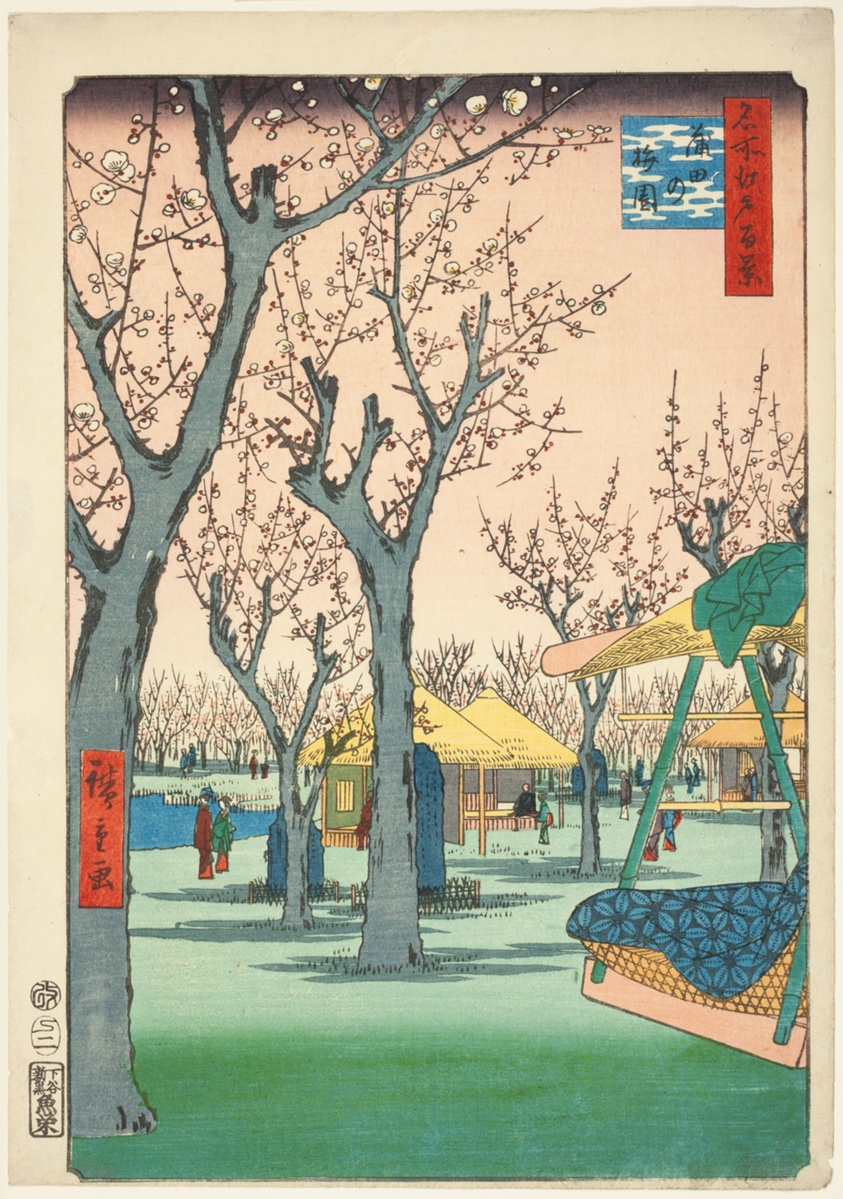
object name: Print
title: The Plum Orchard at Kamata (Kamata no umezono), from the series "One Hundred Famous Views of Edo (Meisho Edo hyakkei)"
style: Japanese (culture or style)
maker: Utagawa Hiroshige 歌川 広重; Japanese, 1797-1858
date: 1857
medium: Color woodblock print; oban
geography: Japan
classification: woodblock print; print; asian art